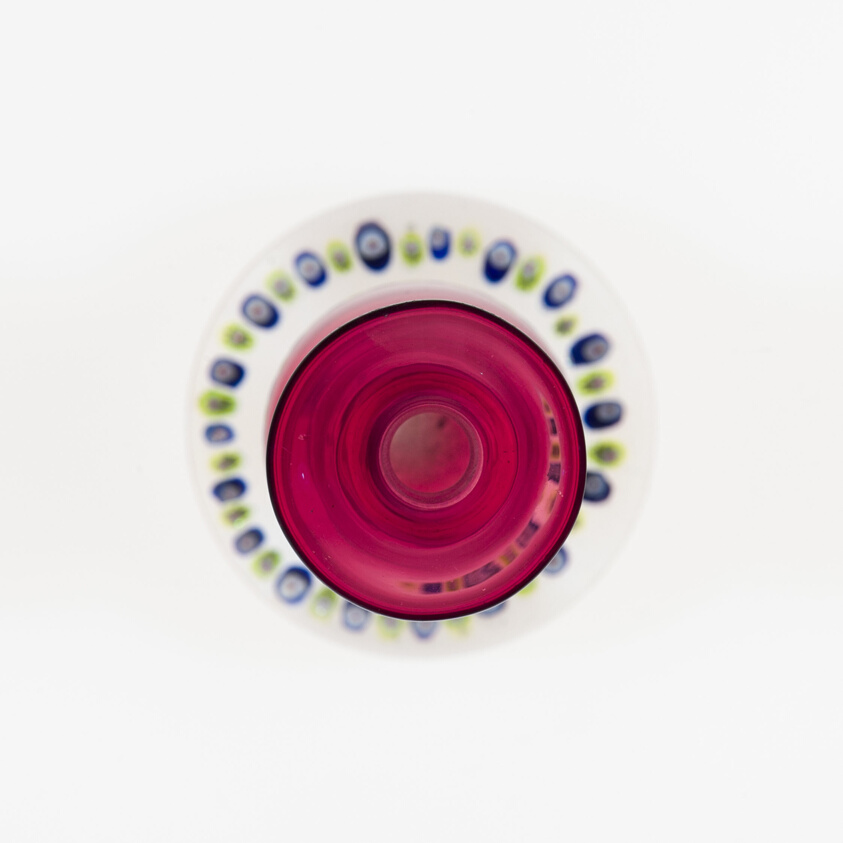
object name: Glass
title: Perfume bottle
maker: Saint-Louis Glassworks (Cristalleries de Saint-Louis); Lorraine, France, founded 1586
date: c. 1845–60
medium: Glass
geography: Saint-Louis-lès-Bitche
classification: paperweight; glass